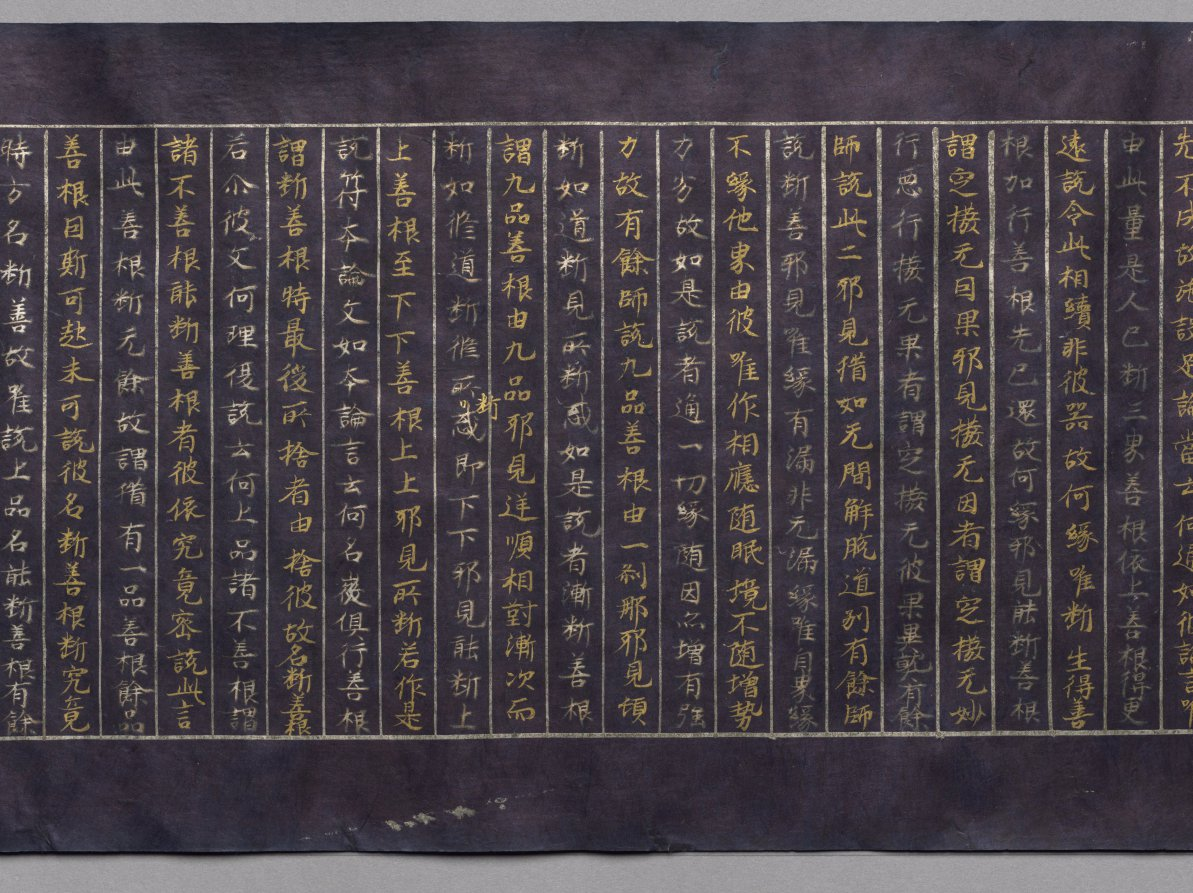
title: Meta-Discourse on the Teachings from the Treasury (Abidharmakosha-Bhashya)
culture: Japan, Heian period (794–1185)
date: 1100s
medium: handscroll; gold and silver on indigo-dyed paper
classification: Manuscript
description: This religious text relates some of the teachings of the great fourth-century Indian Buddhist scholar Vasubhandhu. The text analyzes human consciousness in its relationship to the environment and transformations that occur during meditation. This scroll is the 17th part of a 30-part translation of the text by Xuanzang, an eminent seventh-century Chinese monk.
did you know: The frontispiece depicts the Buddha Shakyamuni preaching in a paradisical landscape.